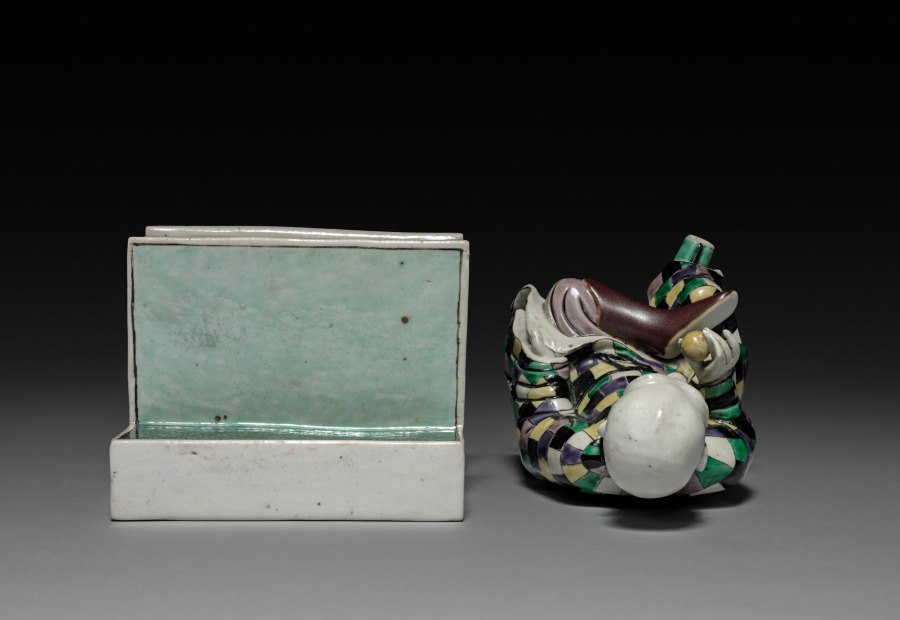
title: Lohan (Arhat) Holding a Peach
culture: China, Jiangxi province, Jingdezhen kilns, Qing dynasty (1644–1911), Kangxi reign (1662–1722)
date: 1662–1722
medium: porcelain with famille verte overglaze enamel decoration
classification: Ceramic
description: Lohan are disciples of Buddha with supernatural powers and eccentric behaviors. This lohan is holding the peach of longevity (shoutao), while its mate is holding the fu-dog, symbolizing good luck. With carefree smiles and playful gestures, these two figures embody a humorous attitude and a detachment from worldly affairs. This pair of porcelain figures was perhaps part of a house altar set or a decorative item in a household.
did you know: This lohan with a bald head wears a monk’s robe made of patches.